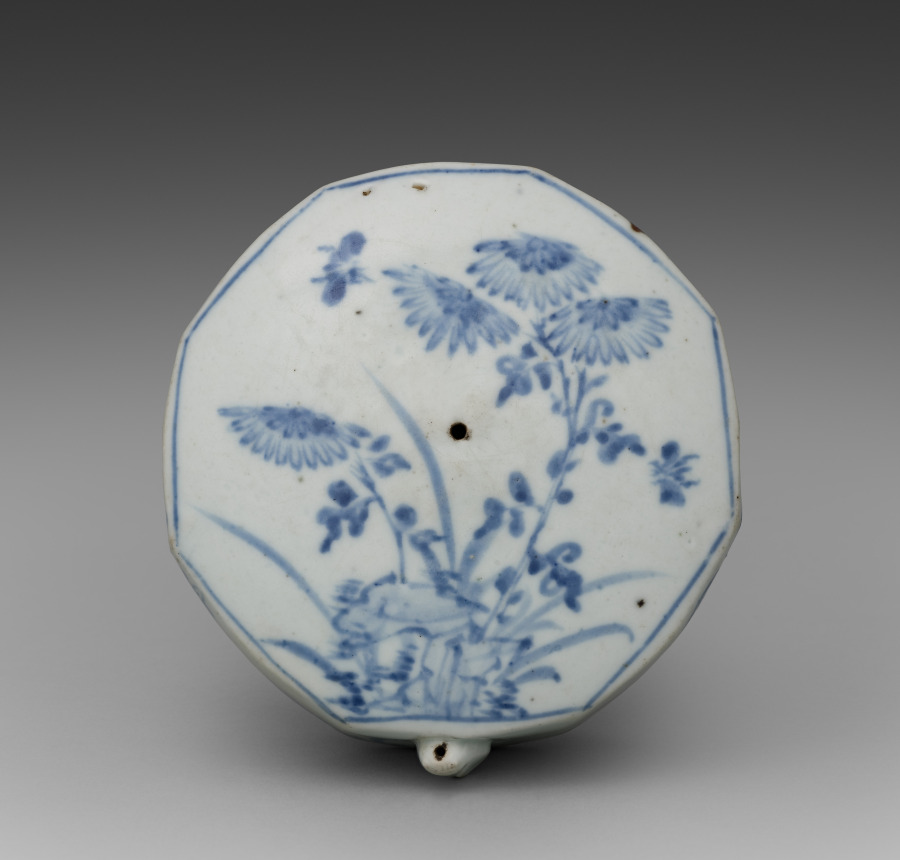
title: Octagonal Water Dropper Decorated with Flower Design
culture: Korea, Joseon dynasty (1392–1910)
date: late 1700s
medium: Porcelain with blue and white decoration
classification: Ceramic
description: A water dropper was an essential utensil for a literati man of the Joseon dynasty (1392–1910) in writing calligraphy. It was used to add water, by small drops, to an inkstone while grinding an ink stick. This work has a small spout in the shape of a cicada. This decorative element not only adds a sense of whimsical sensibility to this scholarly utensil, but also aims to symbolize the aspiration for scholarly achievement—as loud as the cicada’s song.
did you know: A small spout in the shape of a cicada is placed on one of the octagonal sides. This decorative element not only adds a sense of whimsical aesthetic sensibility to this scholarly utensil, but also aims to symbolize the aspiration for scholarly achievement—as loud as the cicada’s song.